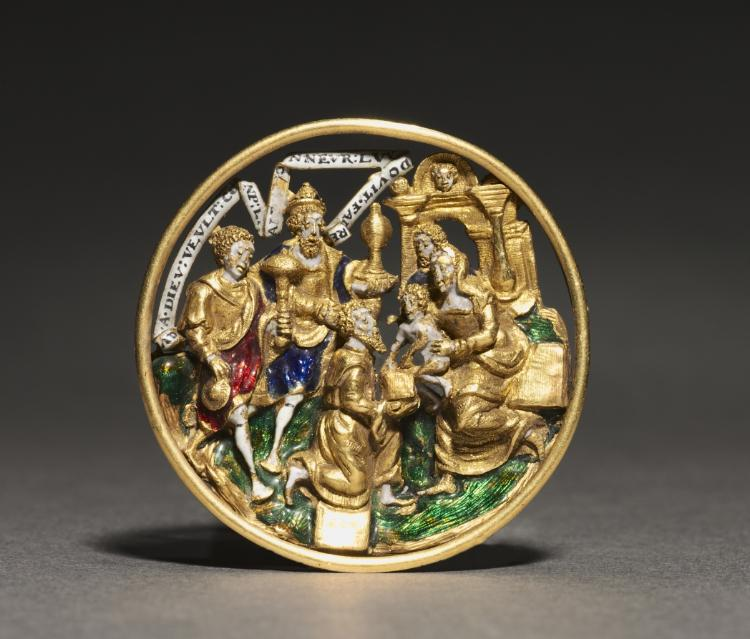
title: Hat Jewel Depicting the Adoration of the Magi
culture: France, 16th century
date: c. 1540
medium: enameled gold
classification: Jewelry